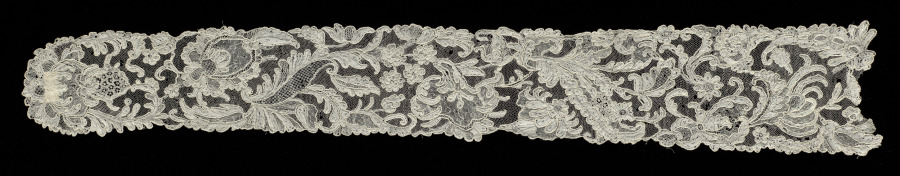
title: Lace Lappet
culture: France, Alençon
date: 1700s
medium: Linen: needle lace (Point d'Alençon)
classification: Lace